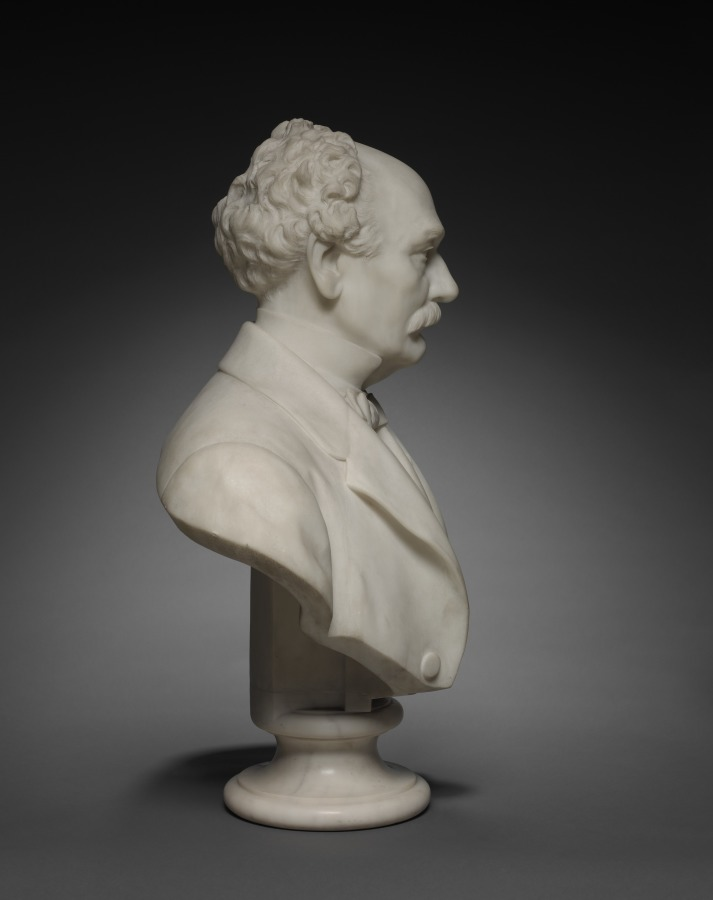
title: Bust of Hinman B. Hurlbut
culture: Italy, Rome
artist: Giovanni Cintselli (Italian, 1832–1883)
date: c. 1870–83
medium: marble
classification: Sculpture